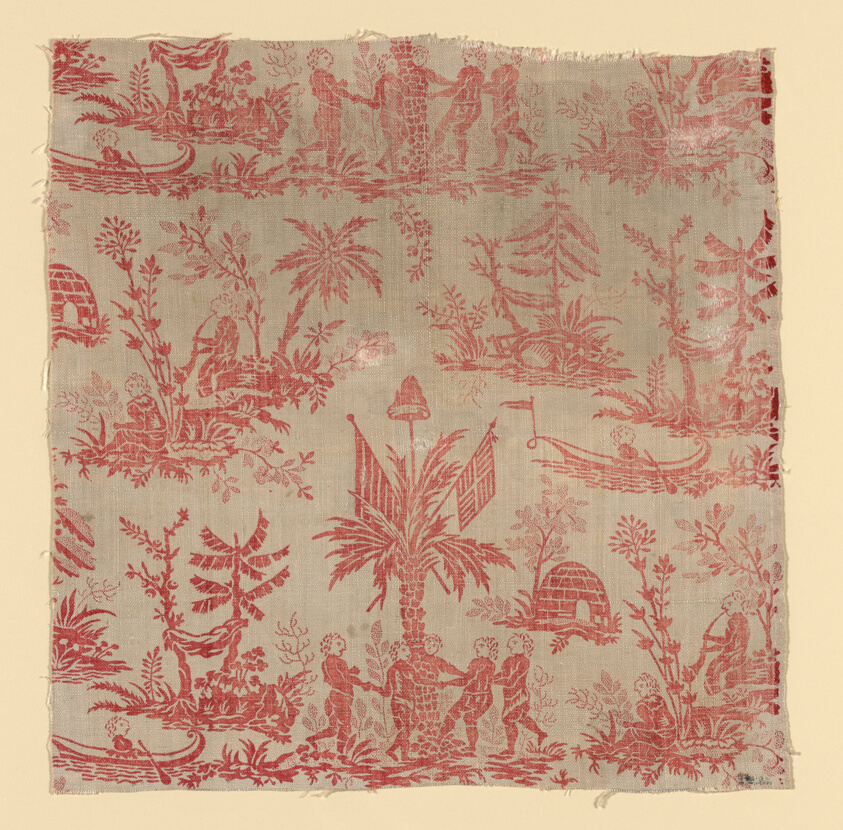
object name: Textile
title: La Danse des Noirs (Furnishing Fabric)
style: jouy-en-Josas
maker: Manufactured by Christophe-Philippe Oberkampf (naturalized French, 1738-1815), Oberkampf Manufactory (French, 1760-1843); Jouy-en-Josas, France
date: c. 1760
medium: Linen and cotton, plain weave; block printed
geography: Jouy-en-Josas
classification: textile; weaving - printed; furnishing textile